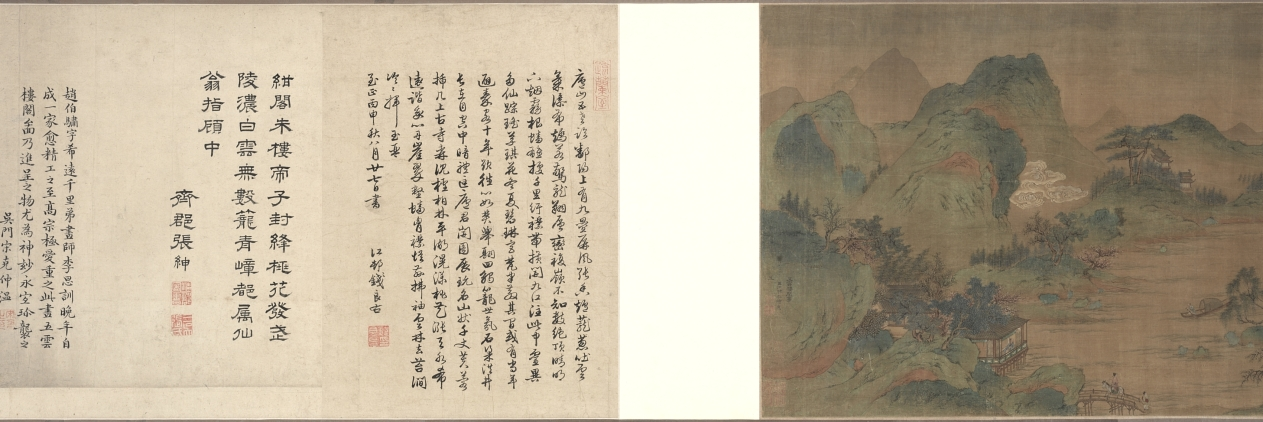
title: Landscape, The Palace of the Clouds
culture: China, Qing dynasty (1644-1911)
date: 1644–1911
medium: handscroll, ink on silk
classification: Painting